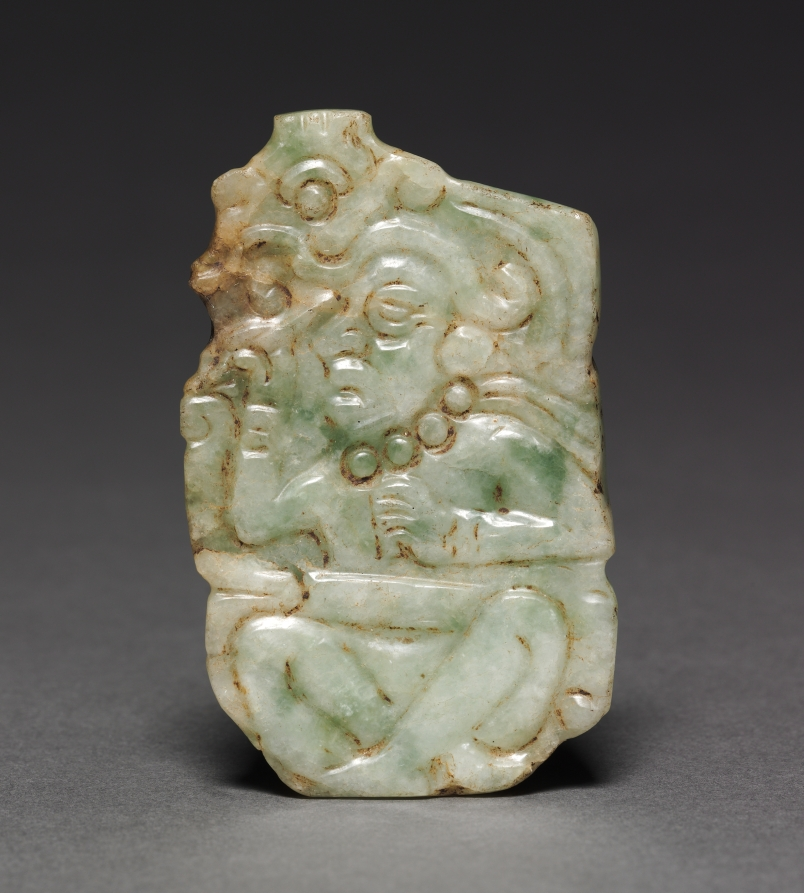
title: Pendant with Scribe Figure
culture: Mexico, Mixtec?, 8th-11th Century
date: c. 700–1000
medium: jade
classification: Jade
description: The seated figure's high status is indicated by an elaborate headdress and jewelry, including earplugs, a necklace, and bracelets. Iin his right hand is a brush, perhaps for painting a book or mural.